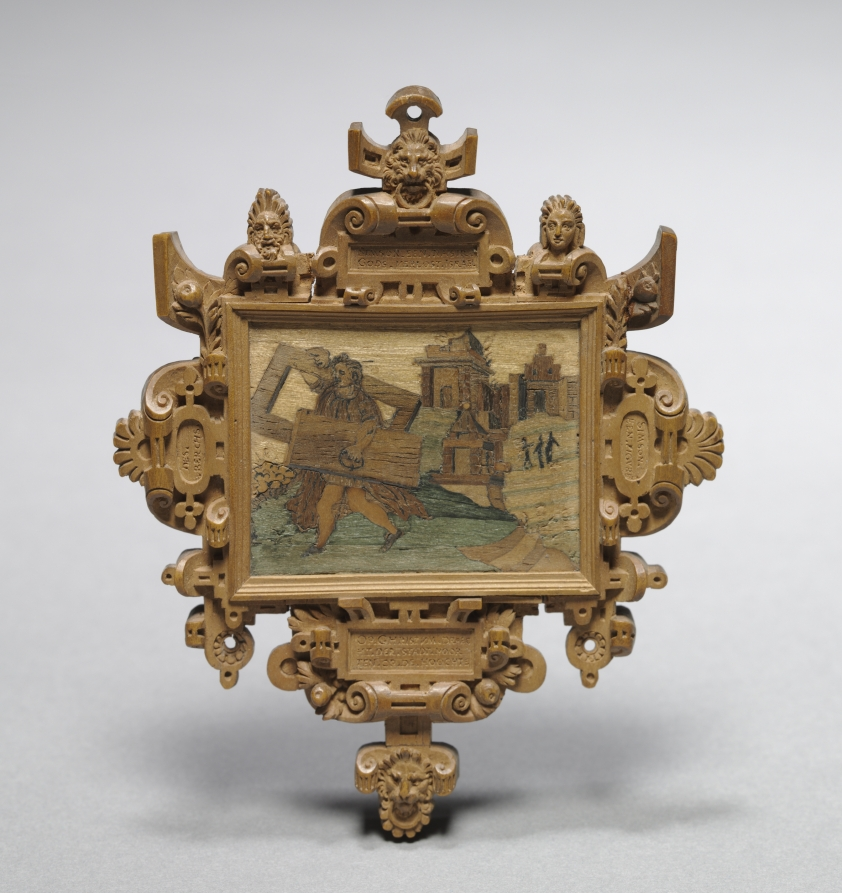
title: Mirror Frame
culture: Germany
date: mid 1500s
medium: boxwood with various inlaid stained wood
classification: Furniture and woodwork